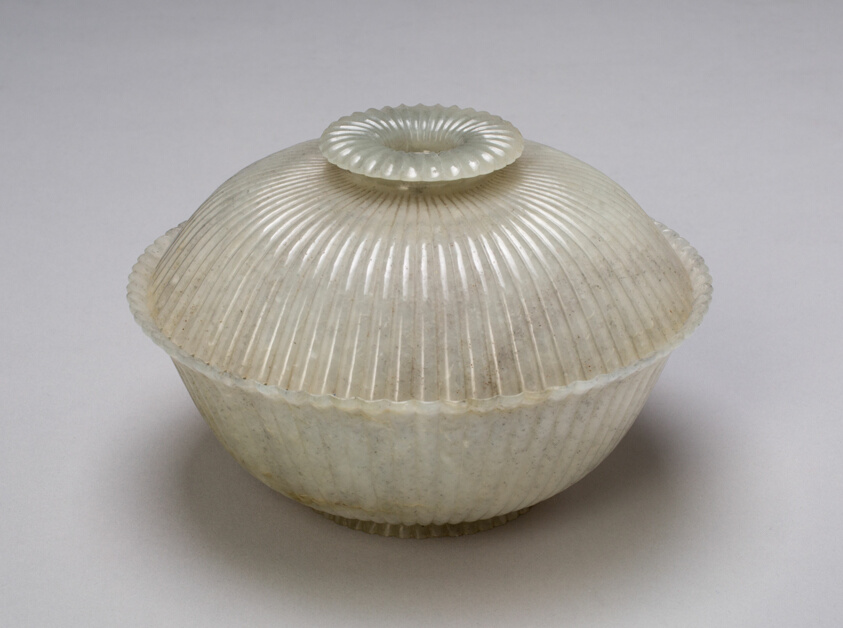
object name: Decorative Arts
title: Covered Bowl in the "Hindustani Style"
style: Chinese (culture or style), Islamic (culture or style)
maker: China or India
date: Late 18th or 19th century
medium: Jade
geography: China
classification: bowl; jade; dish (vessel); asian art; decorative arts